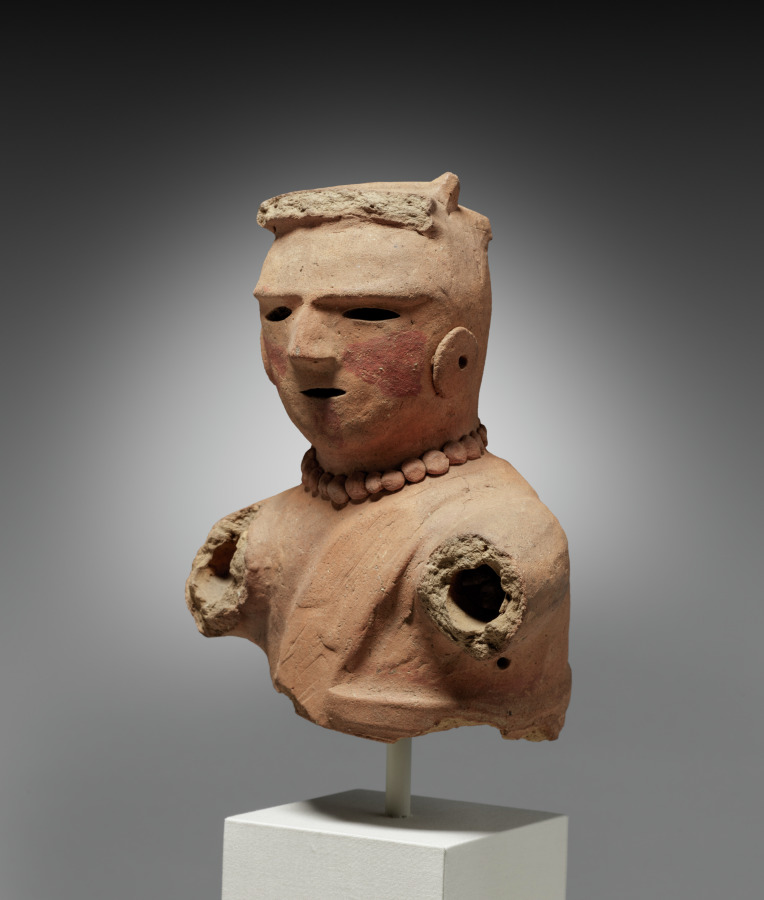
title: Haniwa Figure of a Female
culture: Japan, Kofun period (300–710 CE)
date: 500s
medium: earthenware with traces of pigment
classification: Sculpture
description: Figures in a variety of dress including military and ceremonial garb start to appear on Japanese earthen mounded tombs called old mounds (kofun) from the 400s to 500s CE. This fragment depicts a woman with red triangles on her face and wearing jewelry. Archaeologists speculate that the facial markings had a ritual or symbolic function, perhaps indicating she is a female shaman. Many figures of this kind have been found in digs in the Kanto region of eastern Japan. We can only guess at the meaning of the clay cylinders called haniwa.